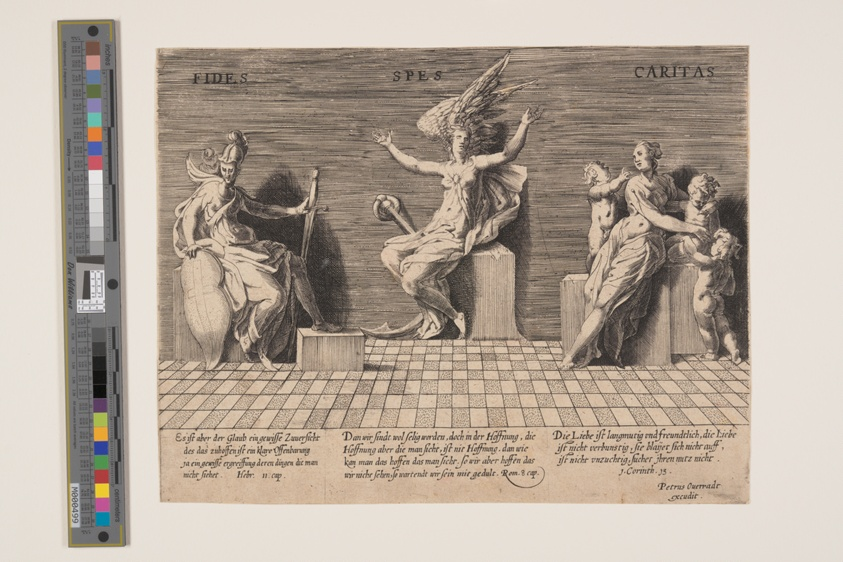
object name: Print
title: The Theological Virtues: Faith, Hope, and Charity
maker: After Adriaan de Weerdt; Flemish, c. 1510-c. 1590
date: c. 1600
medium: Engraving on laid paper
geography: Flanders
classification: engraving; paper; print; prints and drawing